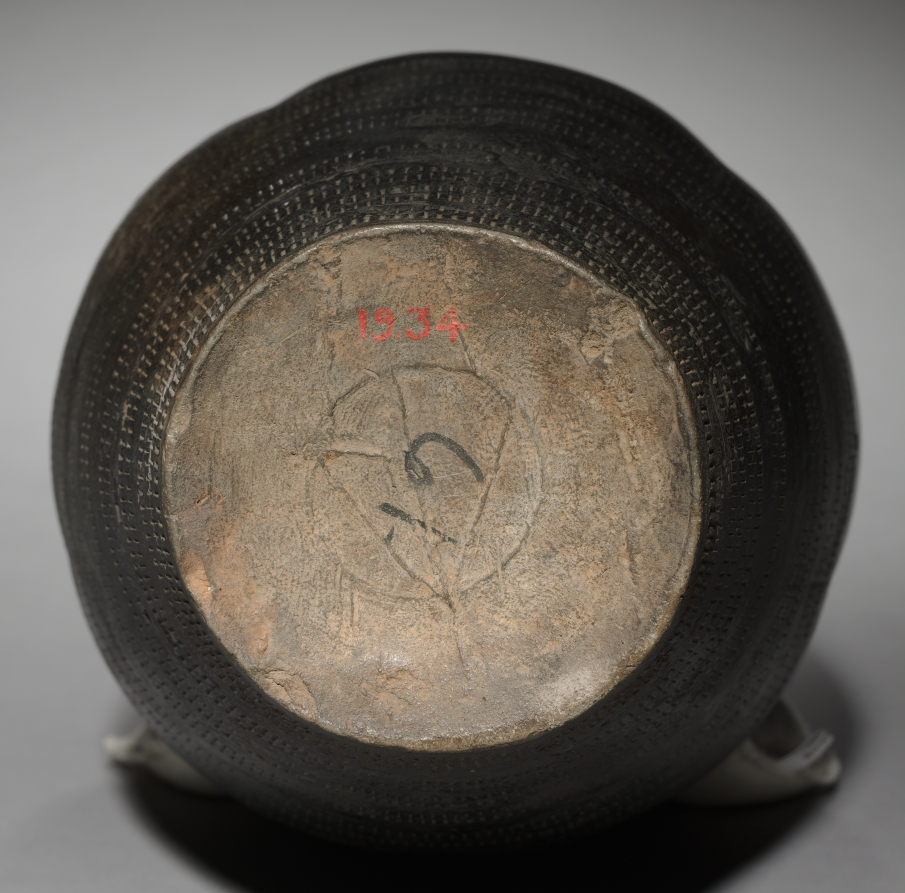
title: Vase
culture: Northeast China, Liao dynasty (916-1125)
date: 916–1125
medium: burnished stoneware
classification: Ceramic